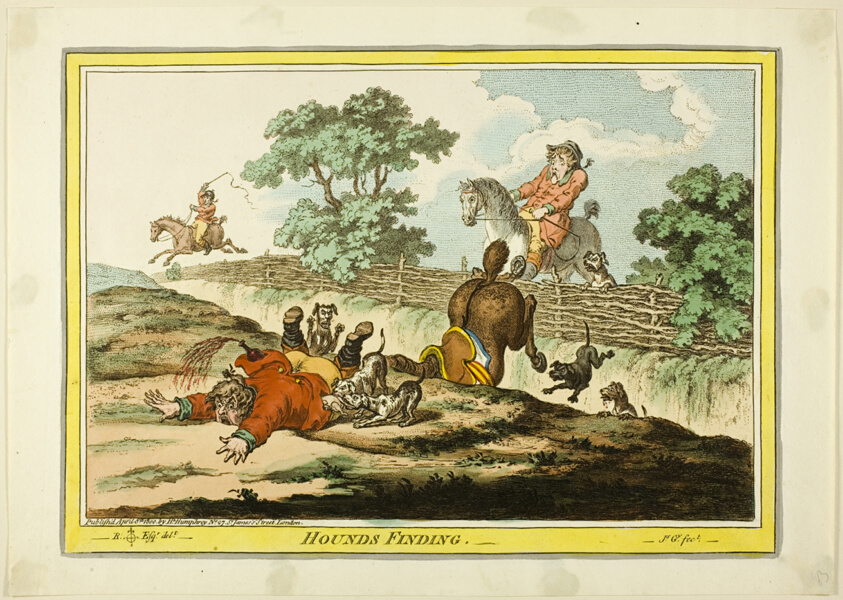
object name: Print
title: Hounds Finding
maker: James Gillray (English, 1756-1815); after Brownlow North (English, 1778-1829)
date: published April 8, 1800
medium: Hand-colored etching on paper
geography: England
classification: etching; print; prints and drawing